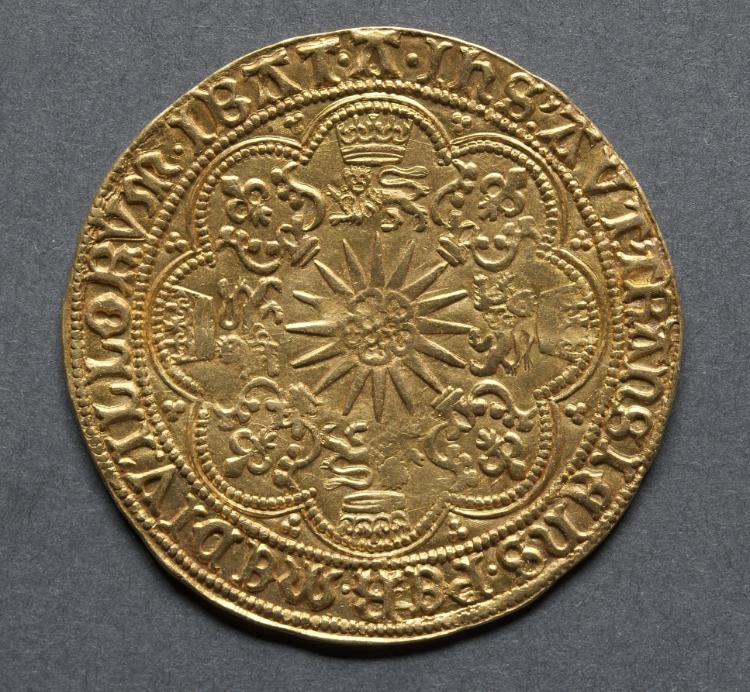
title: Ryal: Rose over Radiate Sun (reverse)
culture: England, Elizabeth I, 1558-1603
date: 1583–1584/85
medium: gold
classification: Coins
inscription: IHS; AVT; TRANSIENS. PER. MEDIV; ILLORVM. IBAT